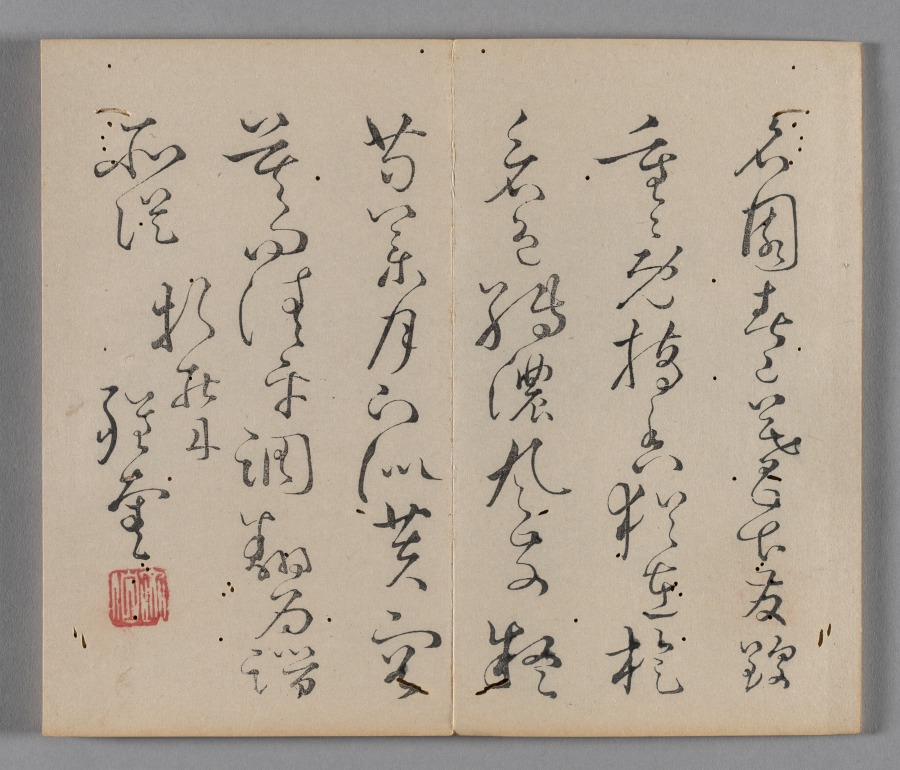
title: Ten Bamboo Studio Painting and Calligraphy Handbook (Shizhuzhai shuhua pu): Miscellaneous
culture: China, Qing dynasty (1644-1911)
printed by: Hu Zhengyan (Chinese, c. 1584–1674)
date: 1633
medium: Woodblock-printed book; ink and colors on paper; first edition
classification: Print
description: Color printing reached a level of perfection in the early 1600s, as seen in this Ten Bamboo Studio Collection of Calligraphy and Painting and the Mustard Seed Garden Manual of Painting (printed 1679 and 1701). The painterly quality, precision in registering (aligning) the woodblocks, and harmonious colors made them the most successful color print editions in Chinese history. Both editions were printed and compiled in Nanjing, spread nationwide, and had a great impact on the arts in Japan and Korea.